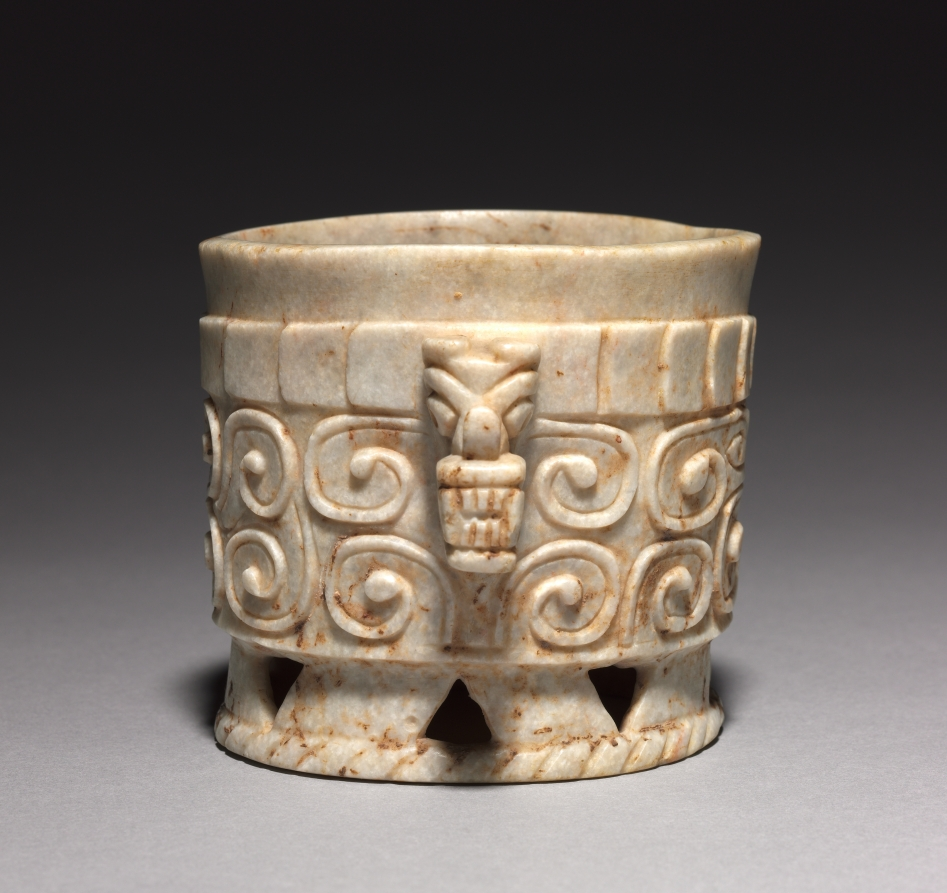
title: Ring-Base Vessel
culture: Honduras, Maya, Ulúa Valley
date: c. 600–1000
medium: marble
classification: Sculpture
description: The Ulúa region of Honduras, to the east of Maya territory, is best known for white marble vessels with walls ornamented in low relief and handles carved as animal heads, here bats but also felines, birds, monkeys, and others. This small example is distinguished by the crispness of its carved scrolls and the triangular cutouts of its pedestal base.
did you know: One of two vessels that were the first ancient American artworks collected by James and Florence Gruener.